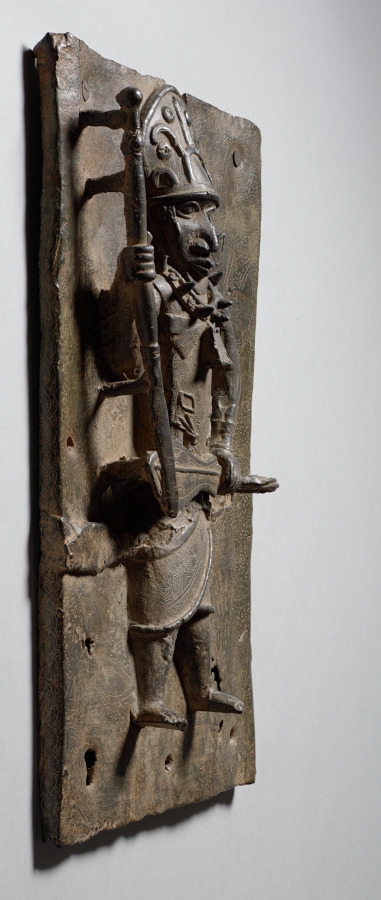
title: Plaque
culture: Nigeria, Benin Kingdom, Ẹdo peoples, members of the Igun Eronmwon (royal brasscasters) guild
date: 1500s–1600s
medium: Copper alloy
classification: Sculpture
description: Craftsmen modeled brass plaques like this in wax before casting them with hot metal. Molds pushed out figures’ general shapes, then details—such as this warrior’s staff and court sword (ẹbẹn)—were added by hand. Reflecting Benin’s global connections, the incised flowers may have Islamic or European origins. Called ebe-amẹn (river leaves) they are identified with Olókun, god of the waters. The interlaced side motifs may connect several early plaques also linked by topic and style. The palace plaques were in storage before the 1897 Siege of Benin. Recently, an art historian virtually reconstructed their former display in the palace based on their dimensions and imagery.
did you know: The bent sides of this plaque once helped attach it to wooden beams in a palace.